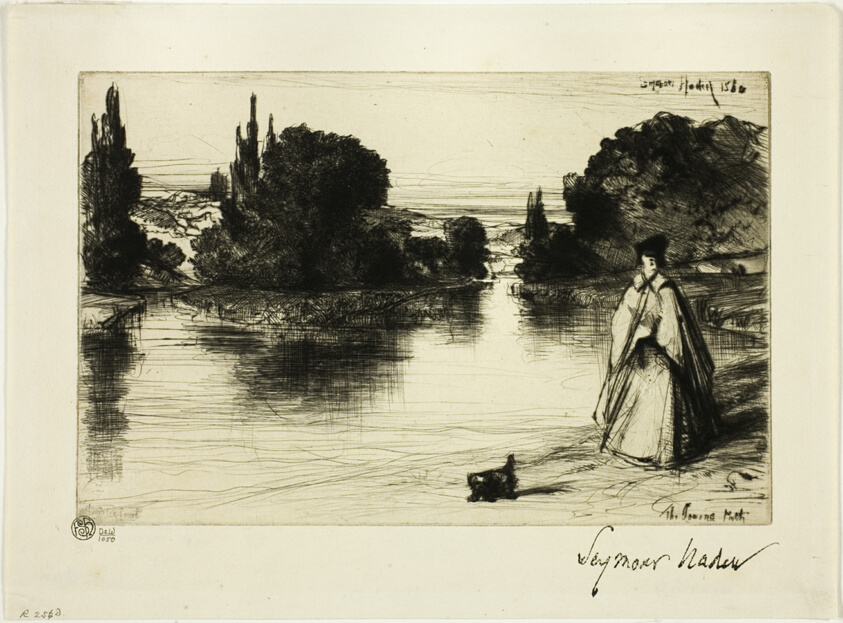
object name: Print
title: The Towing Path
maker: Francis Seymour Haden (English, 1818-1910)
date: c. 1864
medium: Etching and drypoint on copper printed on cream laid paper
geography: England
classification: etching; print; prints and drawing